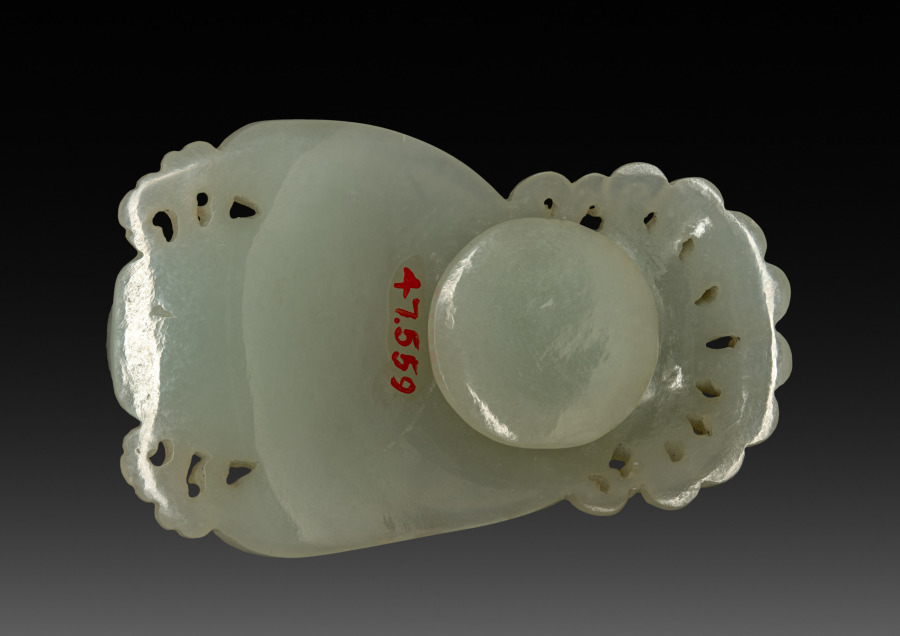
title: Buckle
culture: China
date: 1800s–1900s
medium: white jade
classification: Jewelry